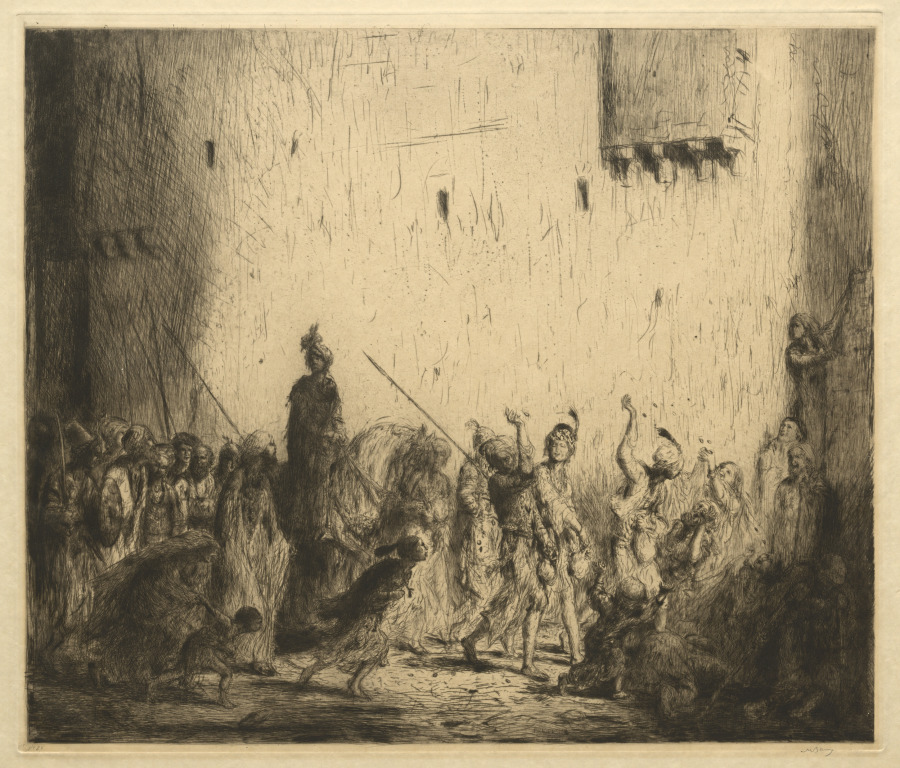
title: A Prince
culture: Netherlands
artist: Marius Alexander Jacques Bauer (Dutch, 1867–1932)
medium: etching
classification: Print